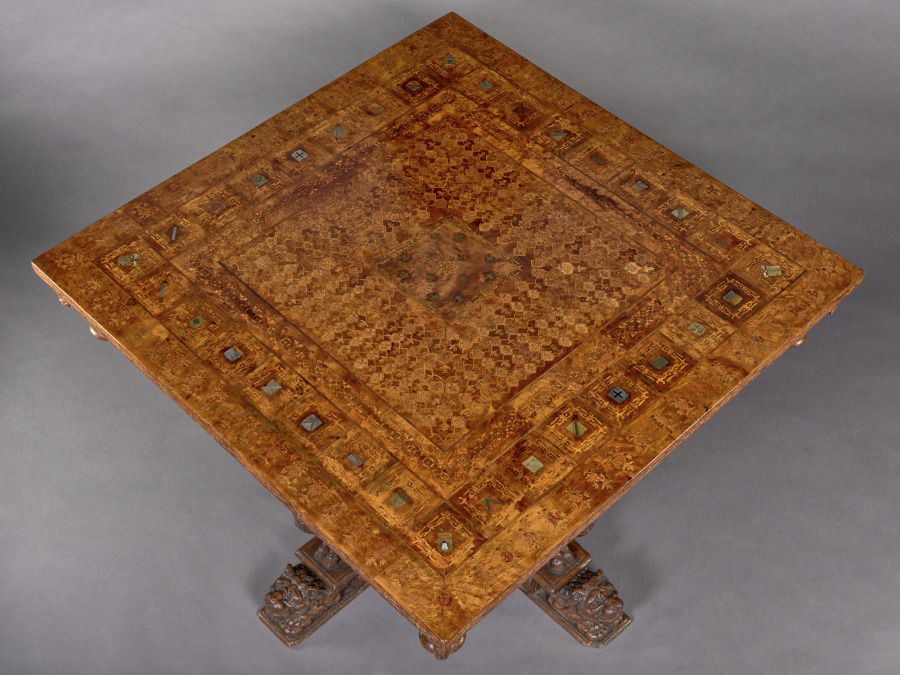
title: Inlaid Table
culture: France, Burgundian School, 16th century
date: 1550–1599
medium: walnut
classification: Furniture and woodwork